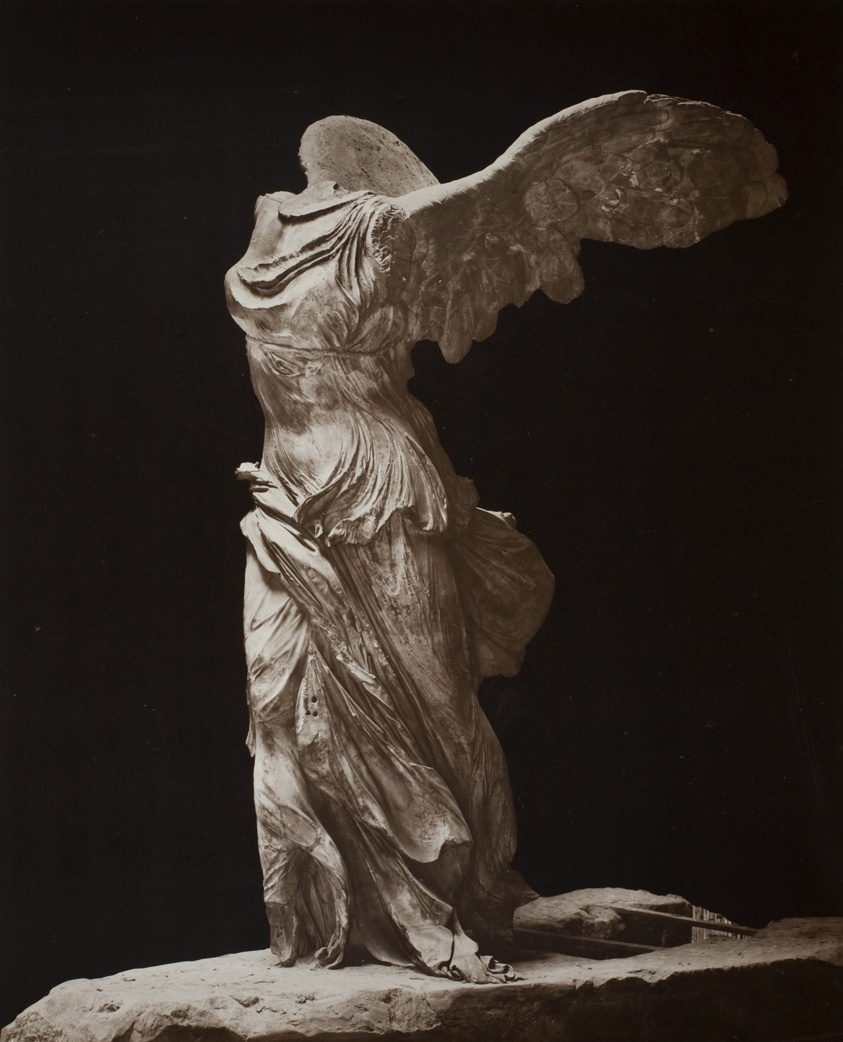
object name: Photograph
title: Winged Victory of Samothrace (Victoire de Samothrace)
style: 19th century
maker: Artist unknown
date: 1860s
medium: Albumen print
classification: photograph; albumen silver print; photography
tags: Paris